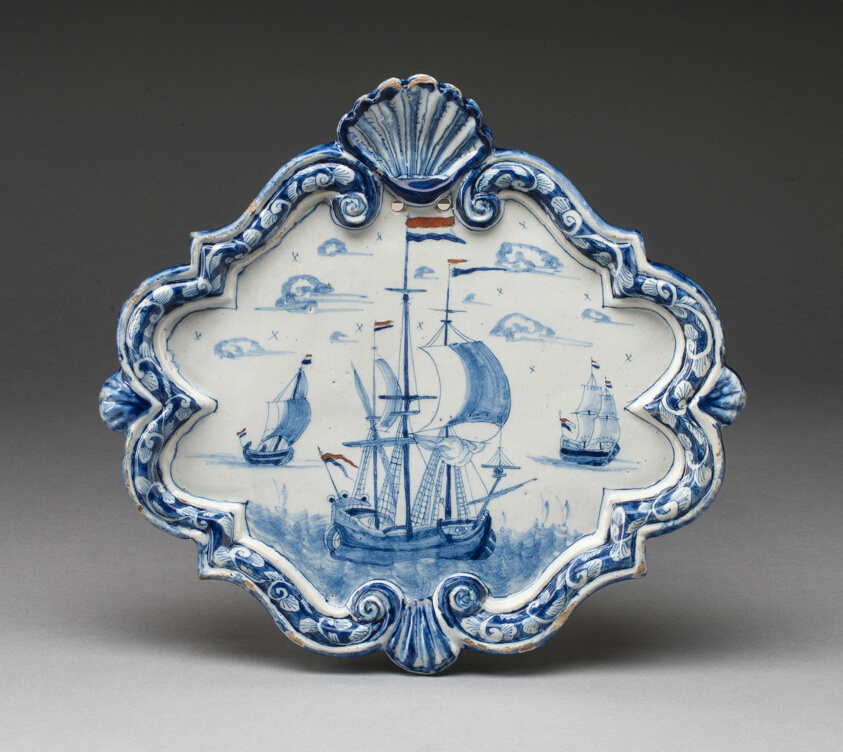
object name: Ceramics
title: Plaque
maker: Delft, Netherlands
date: c. 1750/55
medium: Tin-glazed earthenware (Delftware)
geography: Delft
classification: earthenware; european decorative arts; ceramics